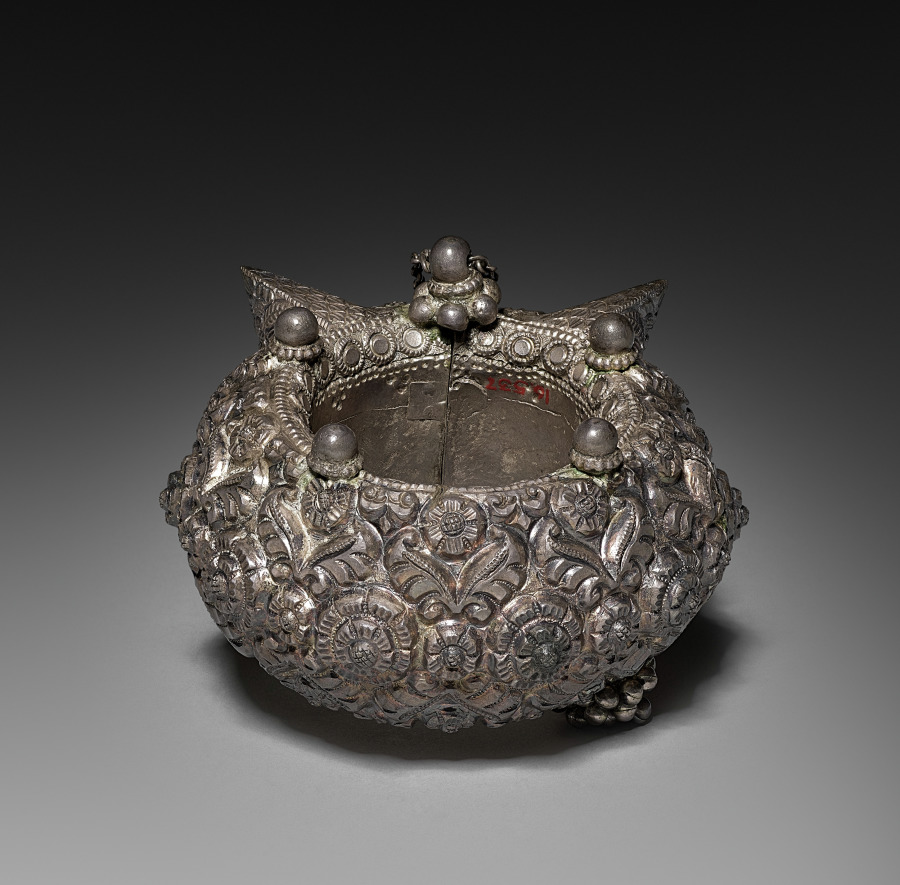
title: Bracelet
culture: Burma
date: 19th Century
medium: silver gilt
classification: Jewelry